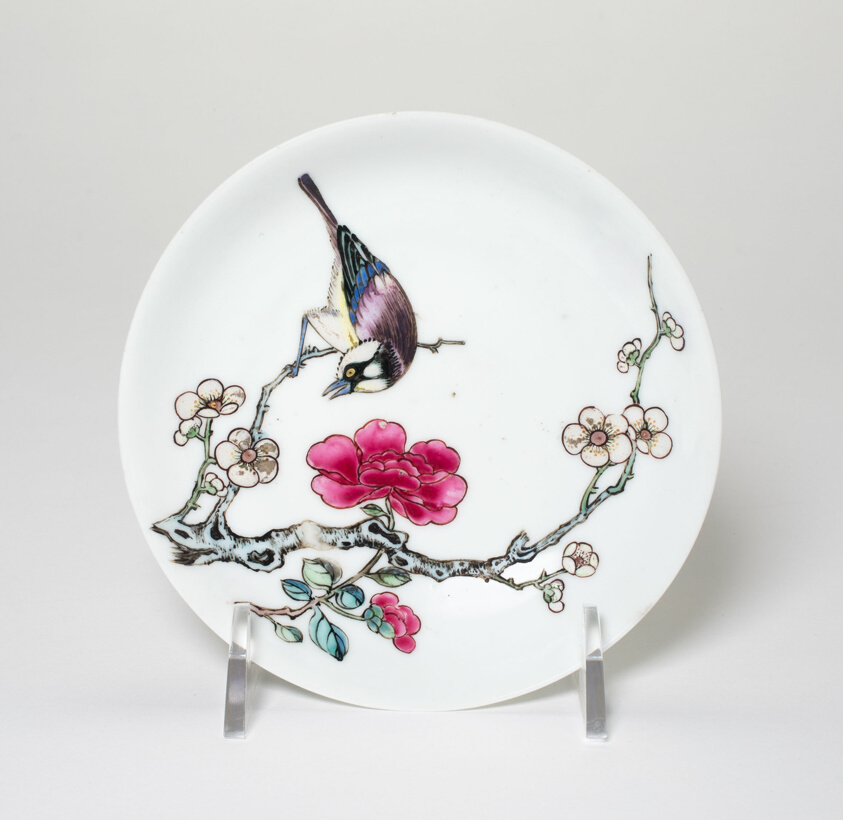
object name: Vessel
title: Saucer with Camellia Flower and Bird on Plum Tree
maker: China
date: Qing dynasty (1644–1911), Yongzheng period (1723–1735)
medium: Porcelain painted in famille rose enamels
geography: China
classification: porcelain; ceramics; asian art